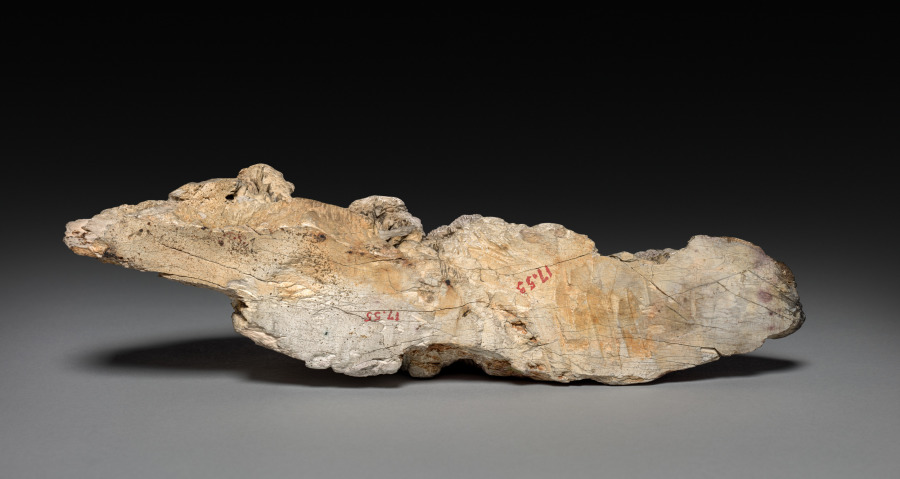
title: Mountain and Landscape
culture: China, Qing dynasty (1644-1911)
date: 1800s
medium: carved stone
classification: Jade